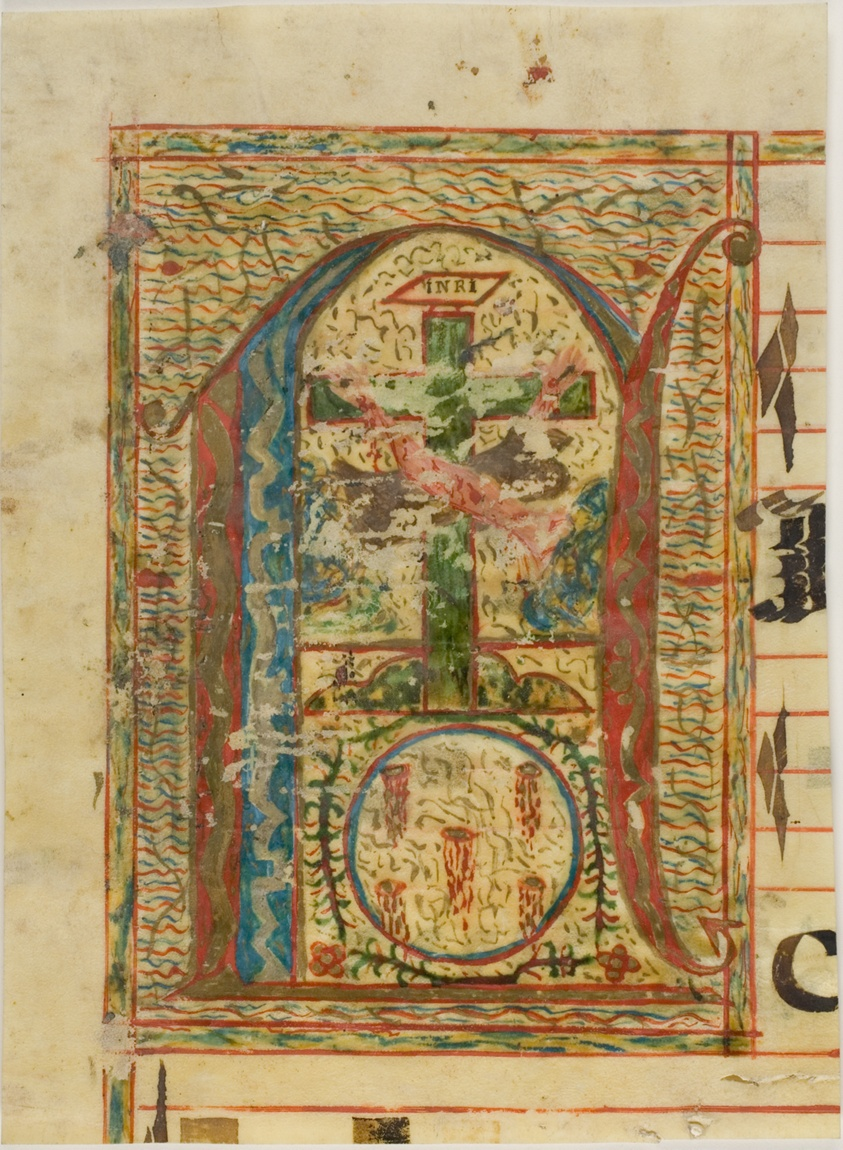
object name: Drawing and Watercolor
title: Historiated Initial "N" with Crucifix from a Manuscript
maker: European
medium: Manuscript cutting in tempera, colored inks, and silver and gold paint, with Latin inscriptions in brownish black ink, ruled in red, on vellum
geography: Europe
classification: tempera; drawings (visual works); prints and drawing